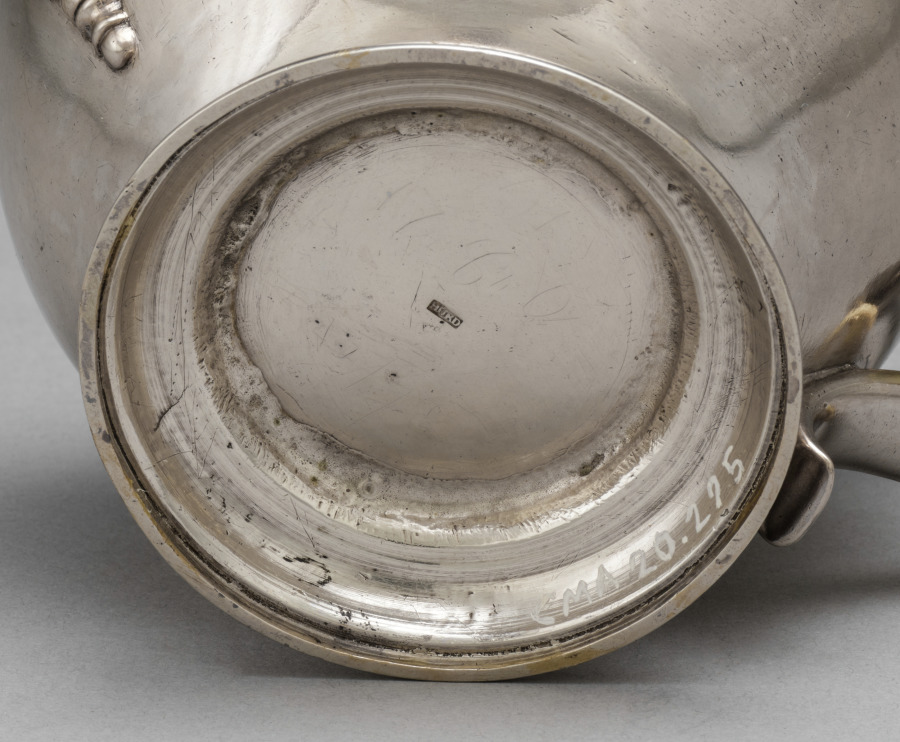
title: Teapot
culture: America, Massachusetts, Boston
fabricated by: Jacob Hurd (American, 1702–1758)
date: c. 1740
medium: silver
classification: Silver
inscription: engraved coat of arms of Whipple.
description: This teapot was made by Jacob Hurd, the father of Nathaniel Hurd whose portrait by John Singleton Copley is in gallery 204. The finial is probably not original to this teapot.